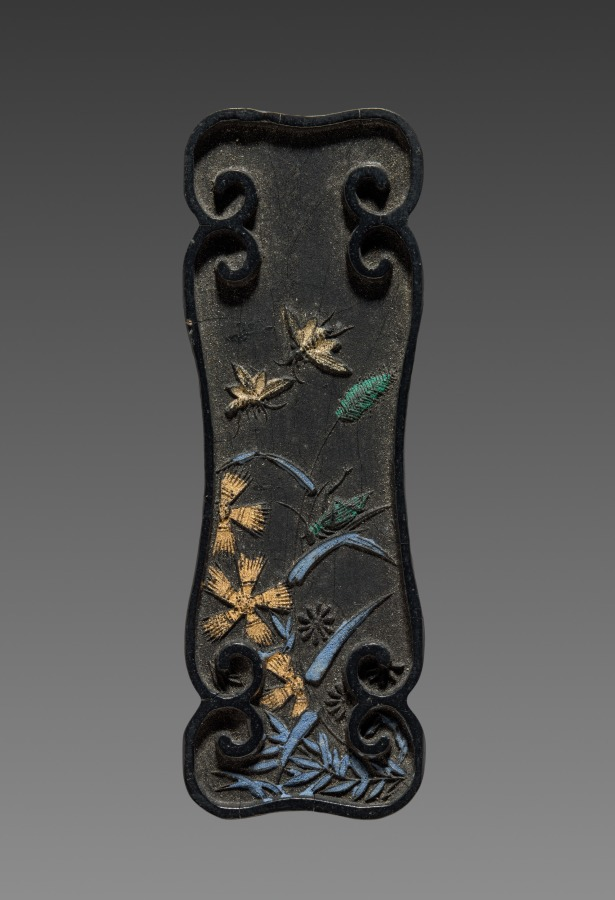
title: Ink Cake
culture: China, Qing dynasty (1644-1911)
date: 19th Century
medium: ink cake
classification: Miscellaneous